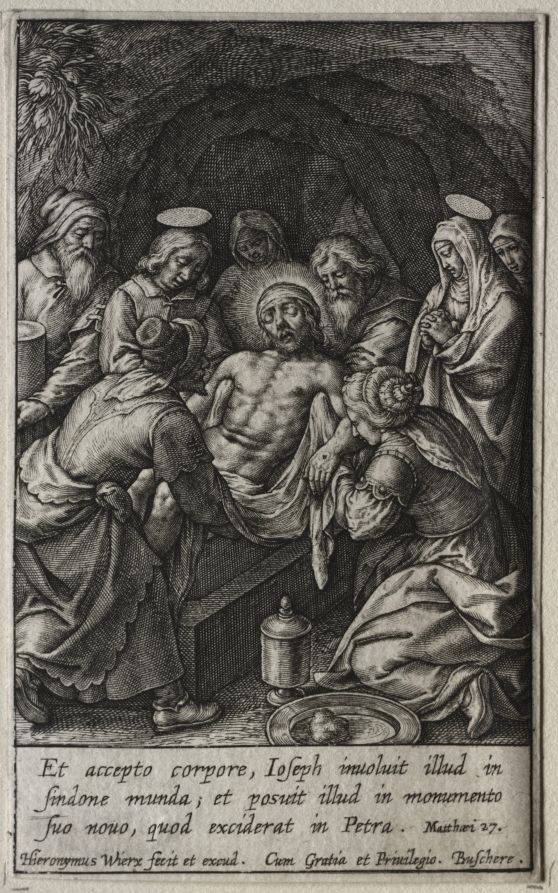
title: The Passion: The Entombment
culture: Flanders, late 16th-early 17th century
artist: Hieronymus Wierix (Flemish, 1553–1619)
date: before 1619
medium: engraving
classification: Print